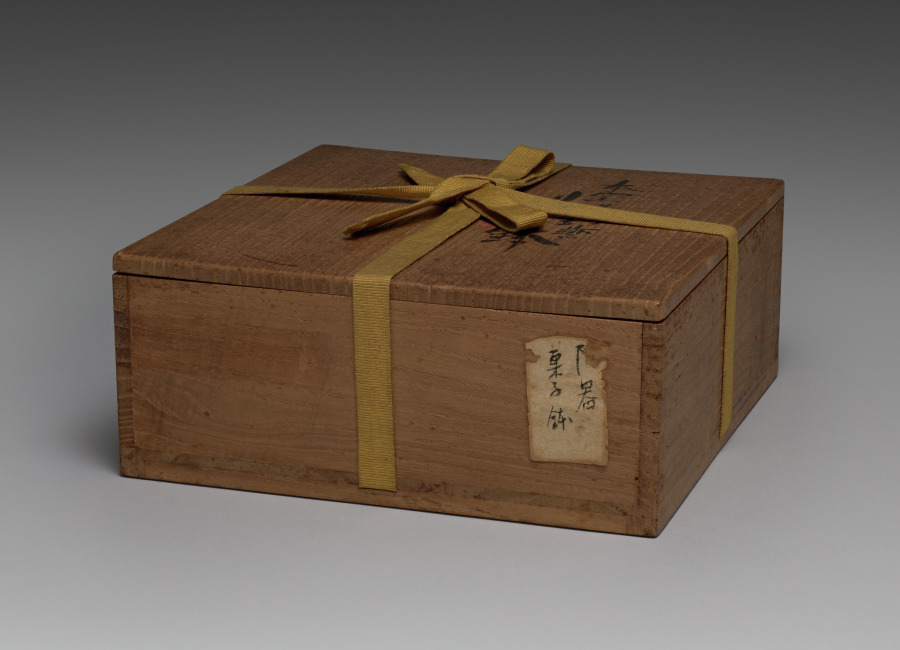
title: Sweets Bowl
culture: Japan, Meiji period (1868–1912)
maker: Seifū Yohei III (Japanese, 1851–1914)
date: 1893–1914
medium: Glazed porcelain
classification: Ceramic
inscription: 清風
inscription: 金聲玉振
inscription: 帝室技芸員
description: Seifū Yohei III was the most prominent head of a ceramics studio in Kyoto that specialized in Chinese-style porcelains and especially items for use in sencha (煎茶), or the drinking of steeped-leaf tea with companions. Sencha was popular among the bunjin of Kyoto and Osaka, who often enjoyed it as part of their emulation of Chinese culture. While sencha was by design less formal than the Japanese tea ceremony, it still featured the display of treasured objects. Prized Chinese antiquities were generally unobtainable, so substitutes such as the Gu-Shaped Flower Vase, CMA 2022.224, were much in demand. Bowls for distributing sweets, like this one, were also a staple of sencha gatherings.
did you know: Names for the glazes, written in ink with a brush on the lids of the custom-made storage boxes for the works, often indicate a specific glaze or ware that had inspired Seifū Yohei III.